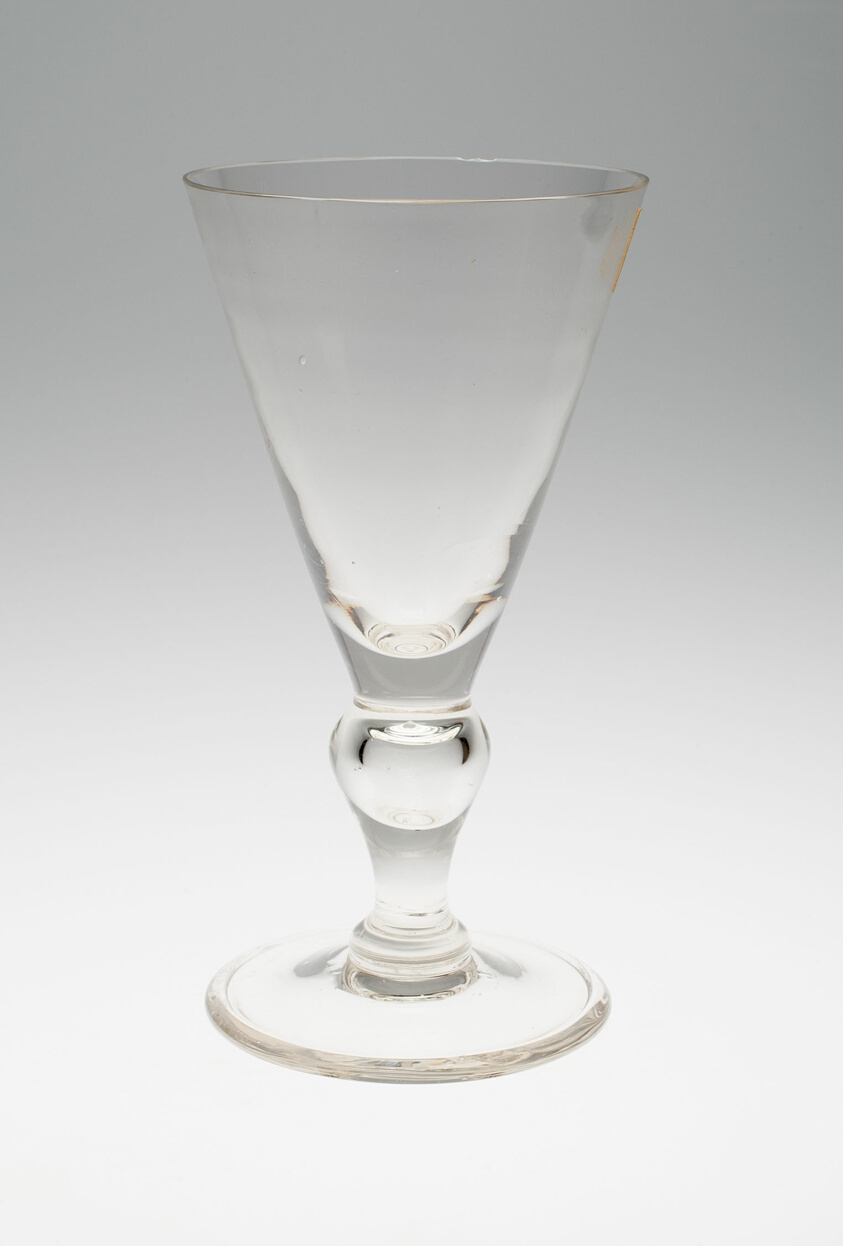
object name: Glass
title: Large Punch Goblet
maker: England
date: c. 1700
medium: Glass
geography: England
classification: drinking vessel; glass; european decorative arts